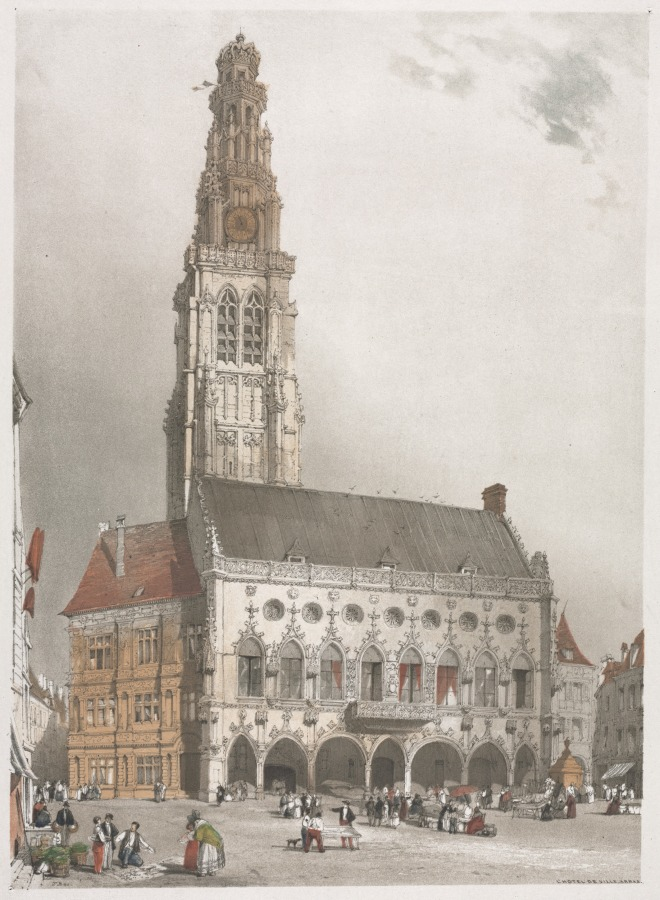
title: Picturesque Architecture in Paris, Ghent, Antwerp, Rouen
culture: England, 19th century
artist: Thomas Shotter Boys (British, 1803–1874)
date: 1839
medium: lithograph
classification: Portfolio